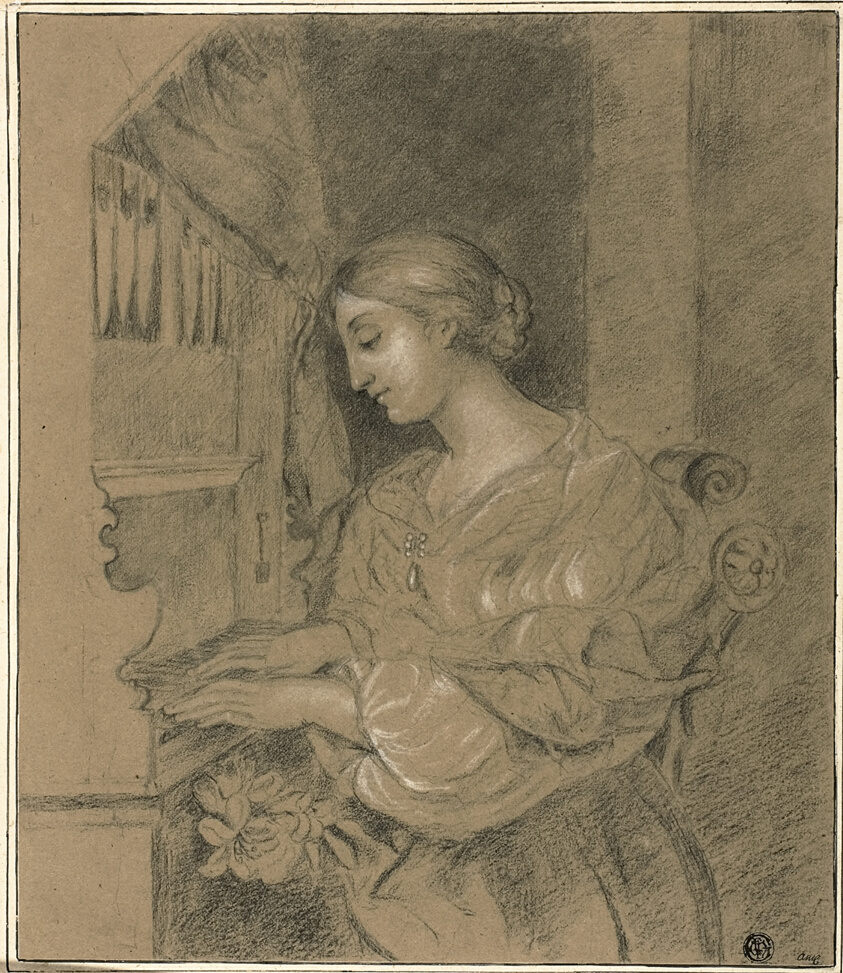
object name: Drawing and Watercolor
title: Saint Cecilia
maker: After Carlo Dolci; Italian, 1616-1686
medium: Charcoal with stumping, heightened with touches of white chalk, with touches of pen and black ink, on tan wove paper, laid down on cream laid card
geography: Italy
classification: charcoal; drawings (visual works); prints and drawing